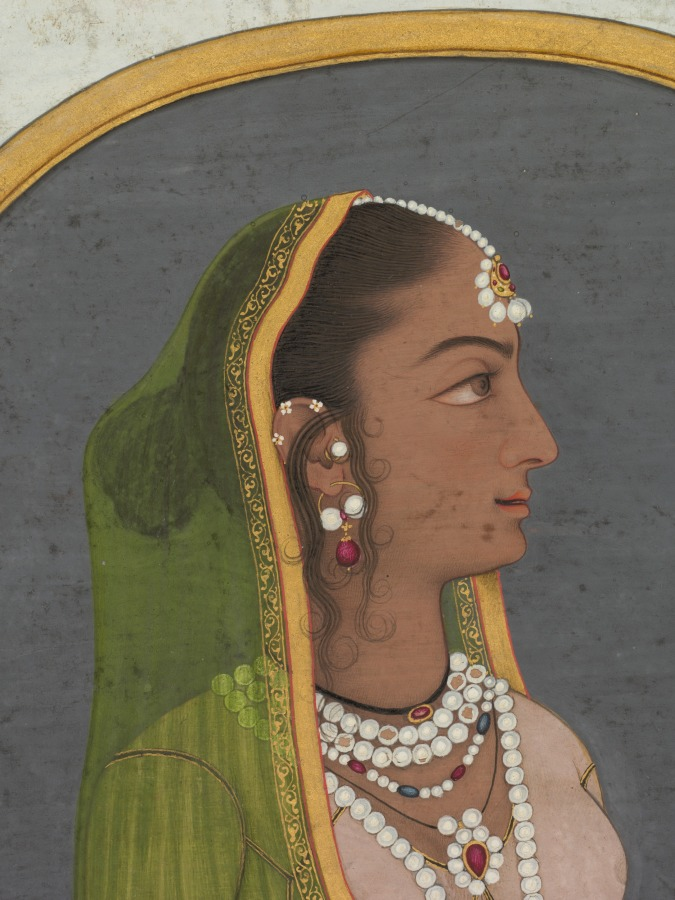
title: Court Lady Pouring Wine (recto)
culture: Mughal India, probably Lucknow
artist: attributed to Muhammad Rizavi Hindi (Indian, active mid-1700s)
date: c. 1760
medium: Gum tempera and gold on paper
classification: Painting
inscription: verso: Illuminated panel of Persian poetry in nast'aliq calligraphy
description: The artist has depicted a glass or crystal duck-headed decanter adorned with a gilded grapevine motif, signaling the contents. The red wine flows from the duck’s mouth into a tiny cup. Such bird-shaped wine vessels are vestiges of the blood sacrifices once part of ancient Persian court rituals. On the verso, floral sprigs illuminate the central calligraphic work, and paired verses have been written in smaller script all around the border. On this page, all the verses are about the beauty of—and longing for—the beloved.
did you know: The bird-headed decanter evokes blood rites of kingship in pre-Islamic Iran.